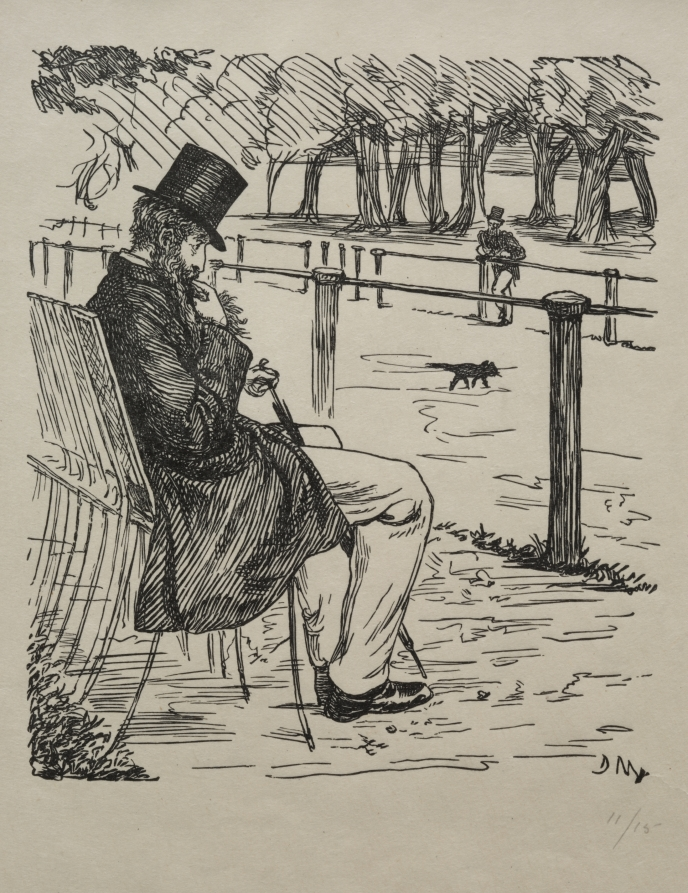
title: The Last of the Barons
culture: England, 19th century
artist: George Louis Palmella Busson Du Maurier (British, 1834–1896)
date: 1855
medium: wood engraving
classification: Print